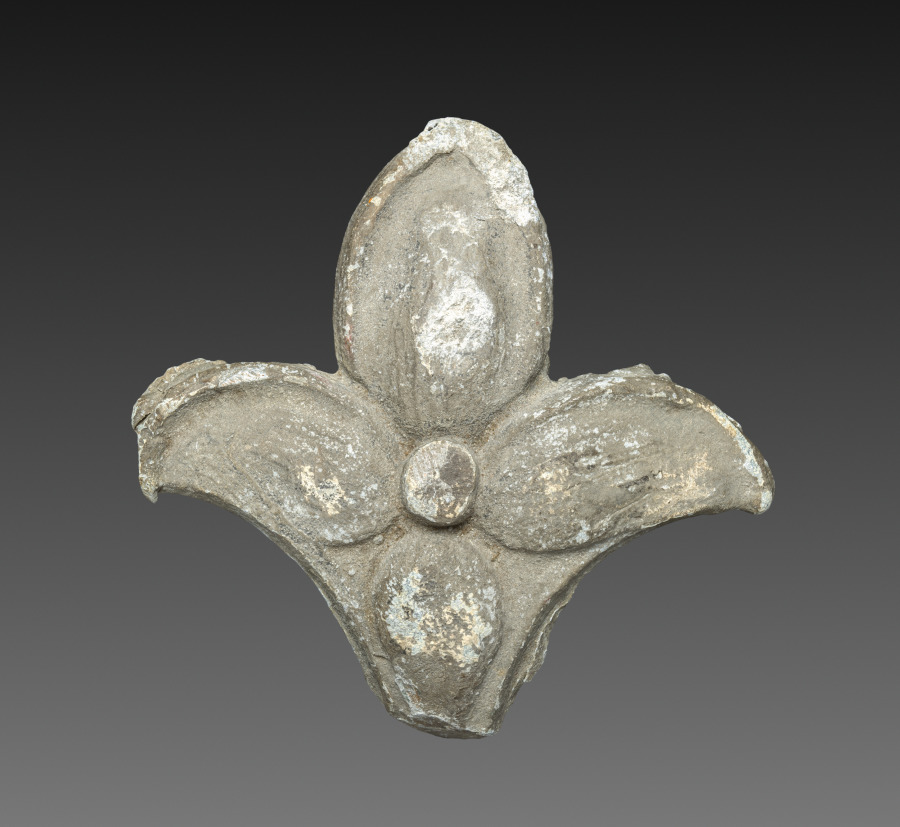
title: Fleur de Lys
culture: France(?)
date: 1700s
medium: lead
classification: Sculpture